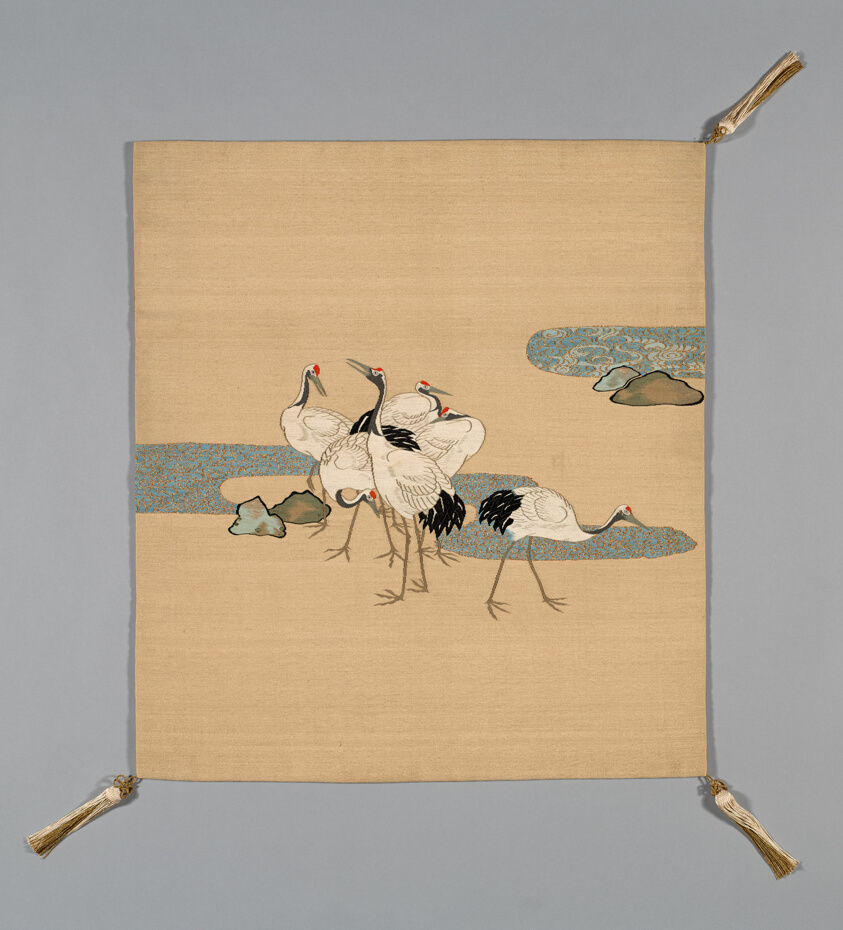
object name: Textile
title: Fukusa (Gift Cover)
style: late edo, meiji, edo (japanese period), Japanism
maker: Japan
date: late Edo period (1789–1868)/ Meiji period (1868–1912), 19th century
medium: Mon side: silk, warp-faced, weft ribbed plain weave (shioze); dye extracted through stenciled chemical dye stripper (bassen); patterned side: cotton, silk and gold-leaf-over-lacquered-paper strip wrapped silk, slit tapestry weave with wrapped outlining wefts (tsuzure); paper interlining; Sewn with front and lining matched in size (Tachikiri awase); corners: silk, gold-leaf-over-lacquered-paper strip wrapped silk, tubular 1:1 oblique interlacing over cotton core, knotted; silk-wrapped cotton ball and re-plied silk, gold-leaf-over-lacquered-paper strip wrapped silk fringe tassels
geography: Japan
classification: textile; weaving